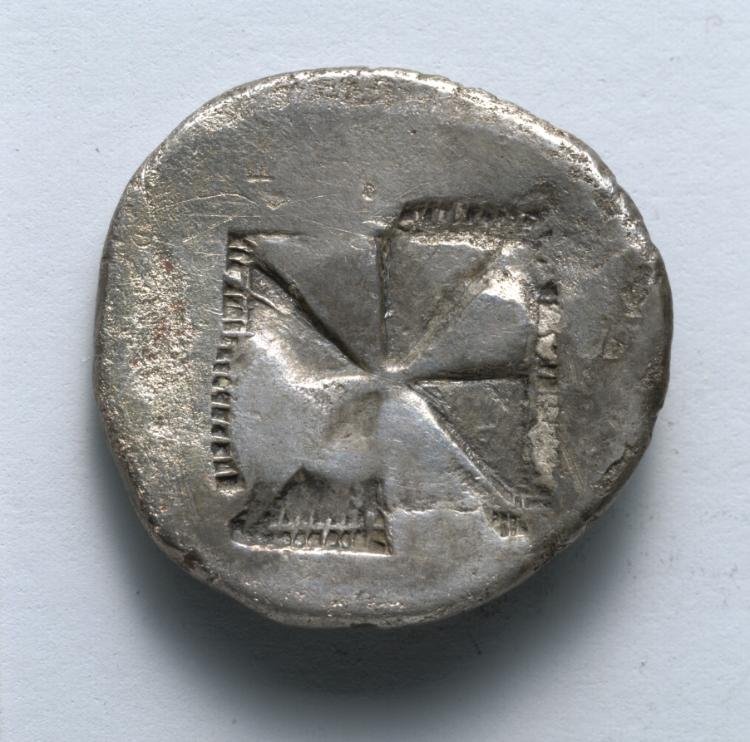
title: Drachm: Incuse Square in four parts (reverse)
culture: Greek, minted at Himera (Sicily)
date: c. 530–483 BCE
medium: silver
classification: Coins